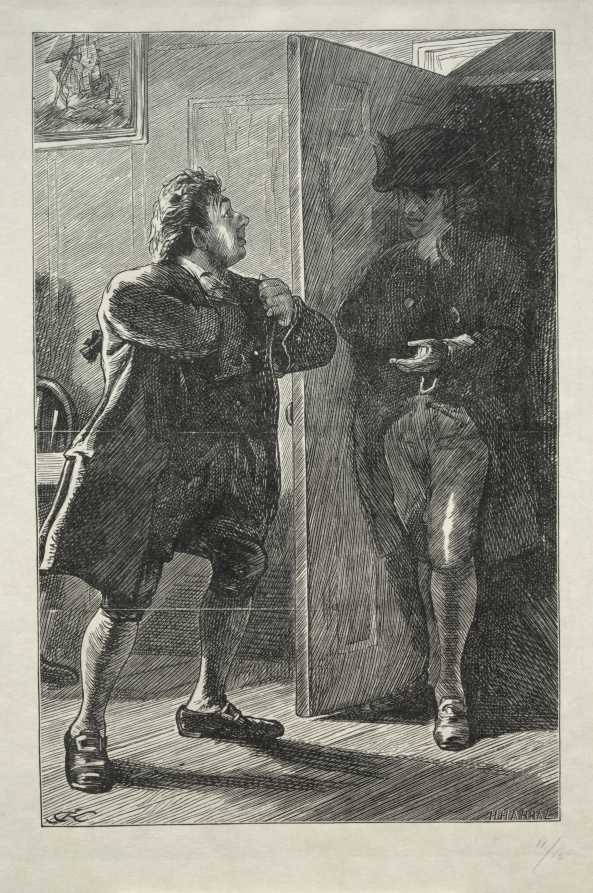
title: An Actor's Holiday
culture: England, 19th century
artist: Horace Harral (British, 1817–1905)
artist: after Charles Samuel Keene (British, 1823–1891)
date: 1867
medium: wood engraving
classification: Print